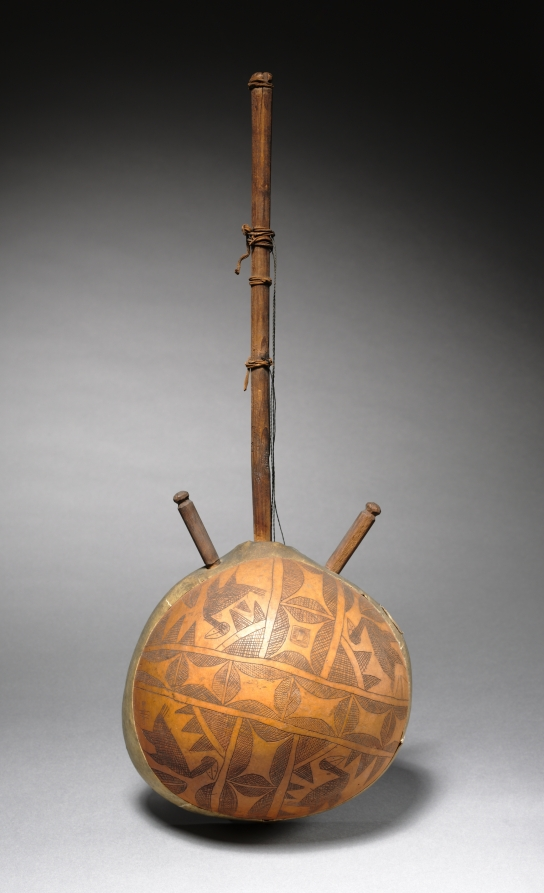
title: Mandoline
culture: Eastern Africa, Madagascar, 20th century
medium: Wood, calabash, rawhide, and string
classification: Musical Instrument